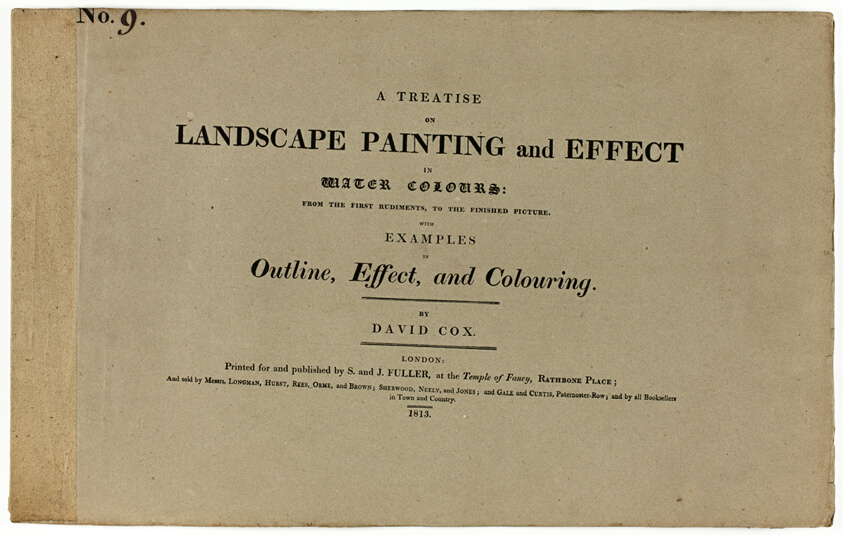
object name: Book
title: A Treatise on Landscape Painting and Effect in Water Colours: From the First Rudiments, to the Finished Picture No. 9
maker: David Cox, the elder (English, 1783-1859); engraved by Richard Reeve (English, 1780-c. 1835); published by S. and J. Fuller (English, 19th century)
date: 1813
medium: Book with four color aquatints and letterpress in black on cream wove paper, in box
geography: England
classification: book; paper; prints and drawing